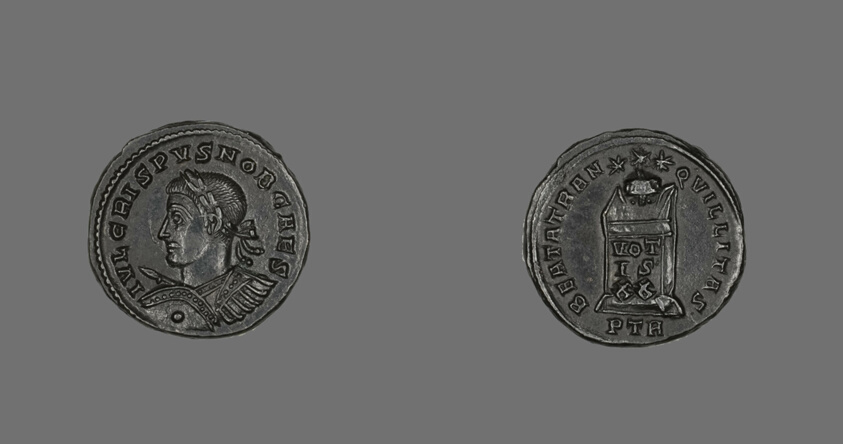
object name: Coin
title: Coin Portraying Emperor Crispus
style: roman (ancient, style or period)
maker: Roman, minted in Trier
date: 321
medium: Bronze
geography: Trier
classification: coin; ancient art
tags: portrait